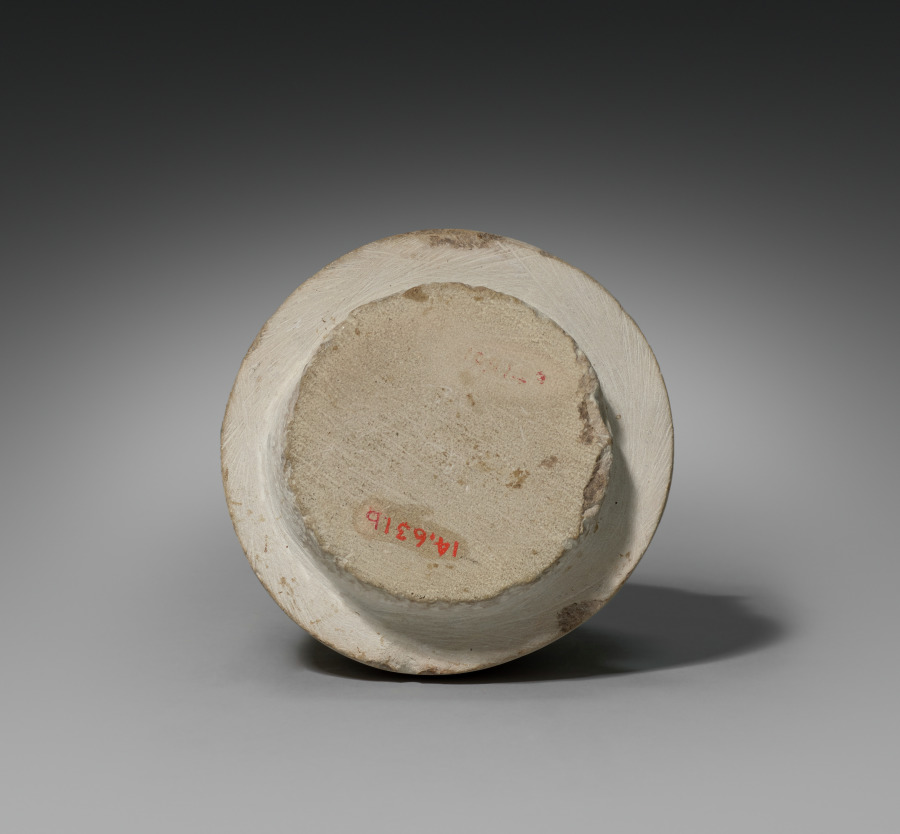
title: Canopic Jar with Lid (lid)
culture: Egypt, New Kingdom (1540–1069 BCE), Dynasty 18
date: 1540–1296 BCE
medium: limestone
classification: Funerary Equipment